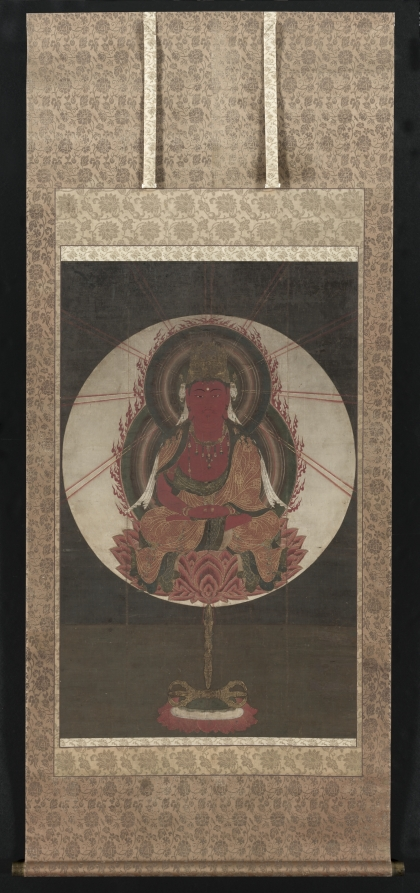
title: Red Amida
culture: Japan, Kamakura period (1185–1333)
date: 1300s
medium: hanging scroll; ink, color, and gold on silk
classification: Painting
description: This rare image depicts the Crimson Crystal Buddha of Infinite Life, or Red Amida, with a red body; it is more common to see Red Amida with a red robe. His crown contains the Five Wisdom Buddhas who represent different aspects of wisdom. He is supported by a lotus flower with five- and single-pronged vajras, ritual implements derived from ancient Indian weapons. Their selection is particular to specific deities and rites and based on sacred texts.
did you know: Red Amida holds his hands in a mudra, or gesture, of welcome, as he receives worshipers to another plane called the Pure Land.